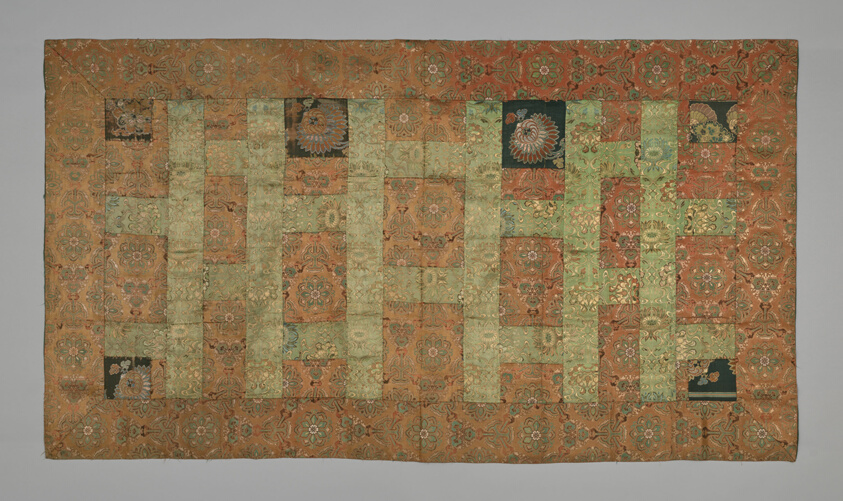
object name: Textile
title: Kesa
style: edo (japanese period)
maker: Japan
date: late Edo period (1789–1868), early 19th century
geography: Japan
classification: textile; liturgical - buddhist; costume; weaving